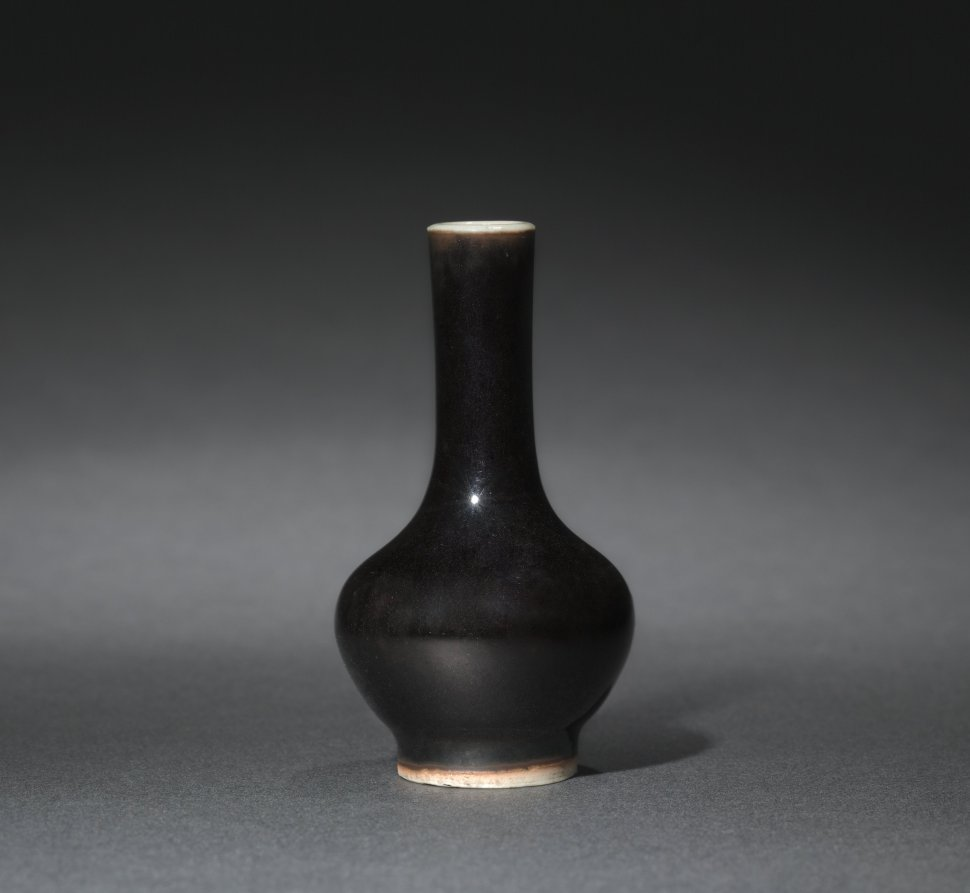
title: Vase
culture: China, Qing dynasty (1644-1911)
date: 1644–1911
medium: glazed porcelain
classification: Ceramic